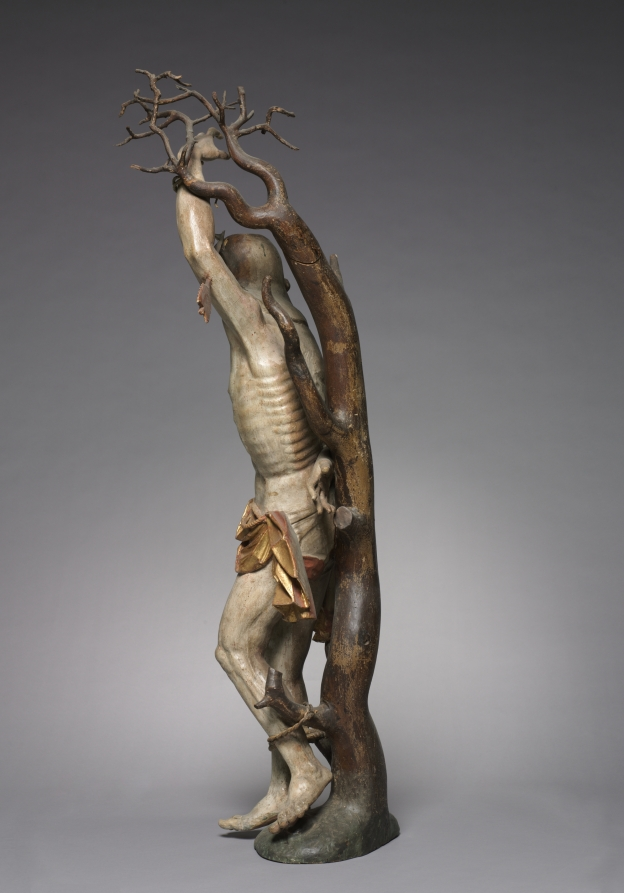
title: Saint Sebastian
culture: Germany, early 17th century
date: c. 1600–1620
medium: painted and gilded wood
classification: Sculpture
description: An early Christian saint and martyr, Sebastian was condemned to death by the Roman emperor Diocletian. Bound to a tree and shot with arrows, he survived—only later to be martyred by beating. This figure embodies the blend of stylistic influences that characterized German sculpture in the early 1600s. The graceful pose and anatomical naturalism of the legs indicate the influence of Italian Mannerism, while the crisp, stylized patterns of Sebastian’s hair and loincloth recall German Gothic works from the 1400s. The tree to which Sebastian is bound is an actual branch, shaped and refined to its present appearance.